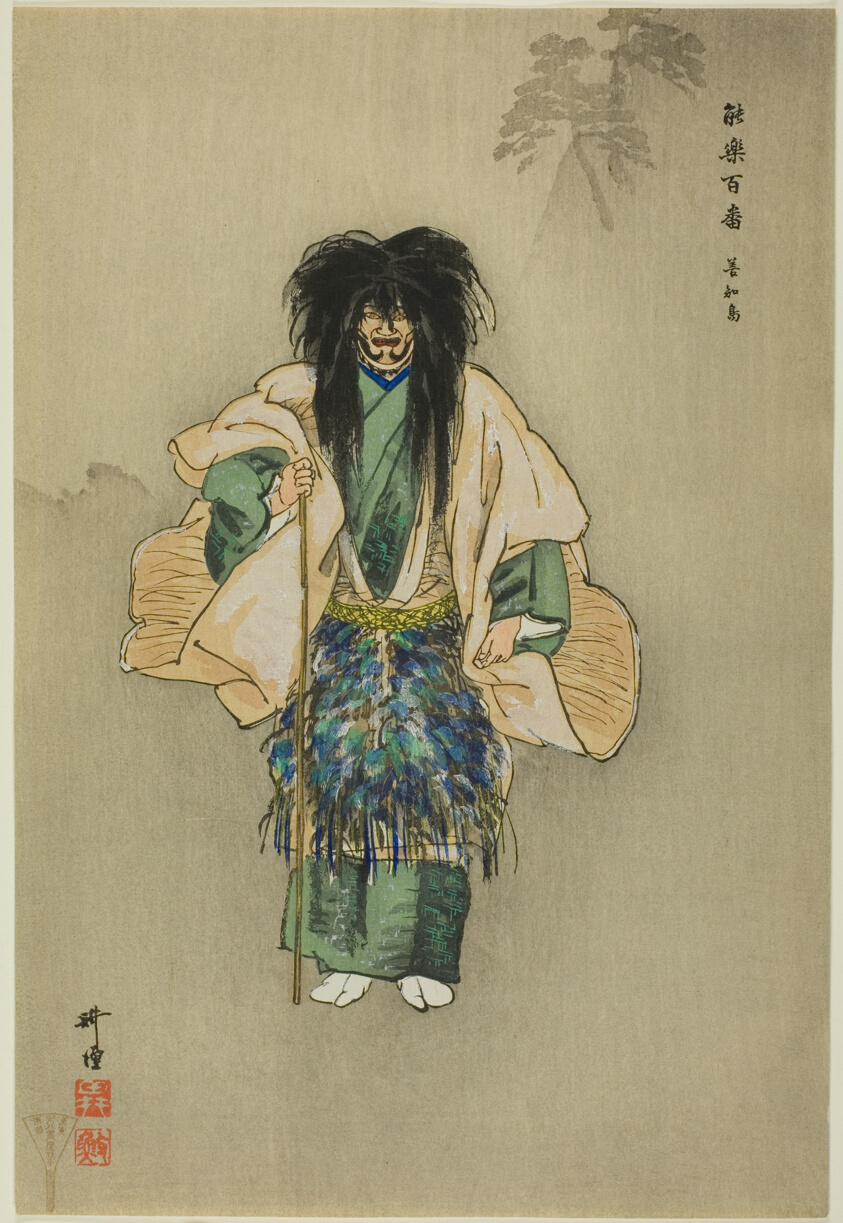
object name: Print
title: Uto, from the series "One Hundred No Dramas (Nogaku hyakuban)"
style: Japanese (culture or style)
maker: Tsukioka Kogyo; Japanese, 1869-1927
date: 1898/1903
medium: Color woodblock print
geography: Japan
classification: woodblock print; print; asian art